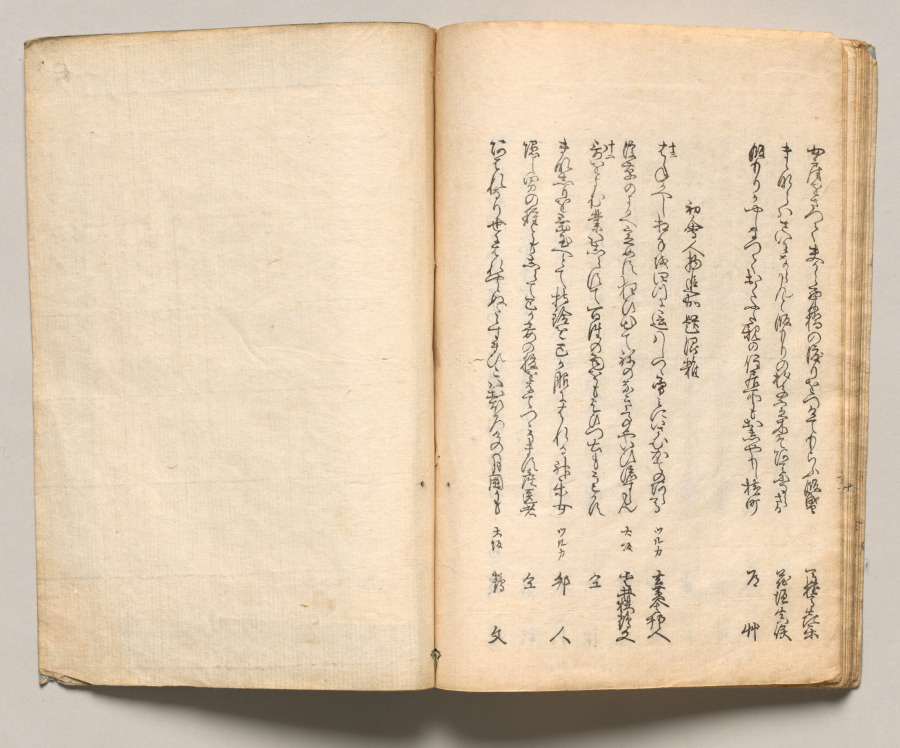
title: Spread Twenty-One from Volume Two of People of Japan in Light Verse (Kyōka)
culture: Japan, Edo period (1615–1868)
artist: Utagawa Hiroshige (Japanese, 1797–1858)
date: 1857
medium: Woodblock-printed book; ink and color on paper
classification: Bound Volume